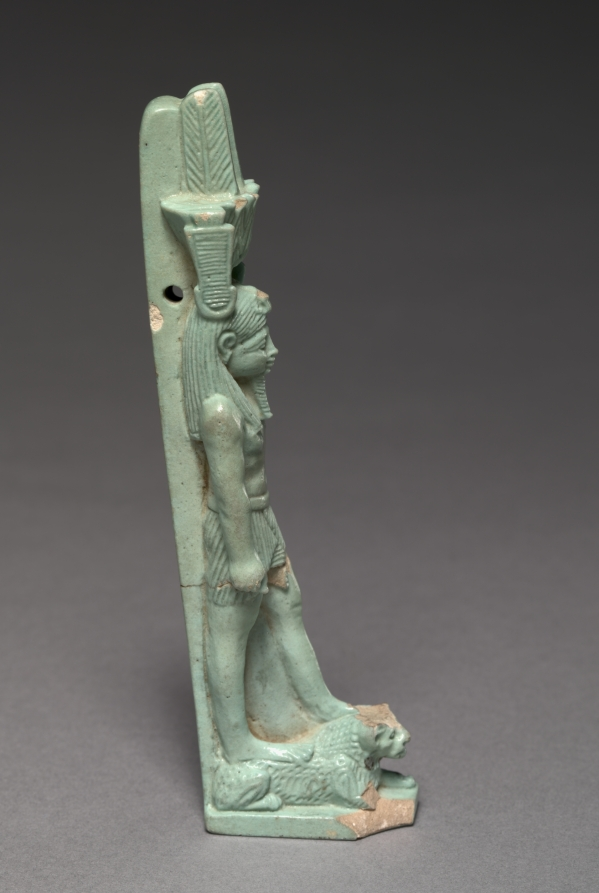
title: Amulet of Nefertem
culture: Egypt, Late period (715–332 BCE), Dynasties 27–30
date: 525–343 BCE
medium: faience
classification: Amulets